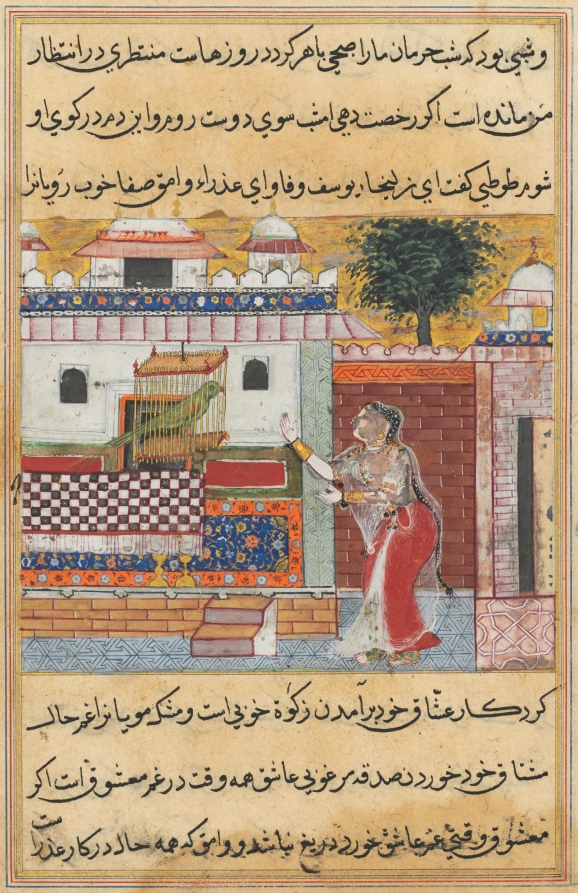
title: The Parrot Addresses Khujasta at the Beginning of the Twelfth Night, from a Tuti-nama (Tales of a Parrot)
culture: Mughal India, court of Akbar (reigned 1556–1605)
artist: Tara 1 (Indian, active 1550s-1590s)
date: c. 1560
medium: gum tempera, ink, and gold on paper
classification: Painting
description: Every night for 52 nights the sly domesticated parrot encourages his master's wife Khujasta to meet her lover under cover of darkness. Just before she leaves, he mentions a topic from a tantalizing tale; she becomes so curious that she cannot go out before hearing the whole story. By the time the story ends, dawn breaks, and it is too late for her to go out unnoticed. The gold sky and geometric tile patterns are derived from Persian sources while Khujasta's figure shown in profile and style of dress are purely Indian. The artist has chosen to tilt the carpet up in defiance of realistic perspective to show off the fine arabesque motif. The checkered bedspread calls attention to the empty bed and Khujasta's longing to be with her lover.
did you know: The gauzy fabric that Khujasta wears over her sari is called an odhani.